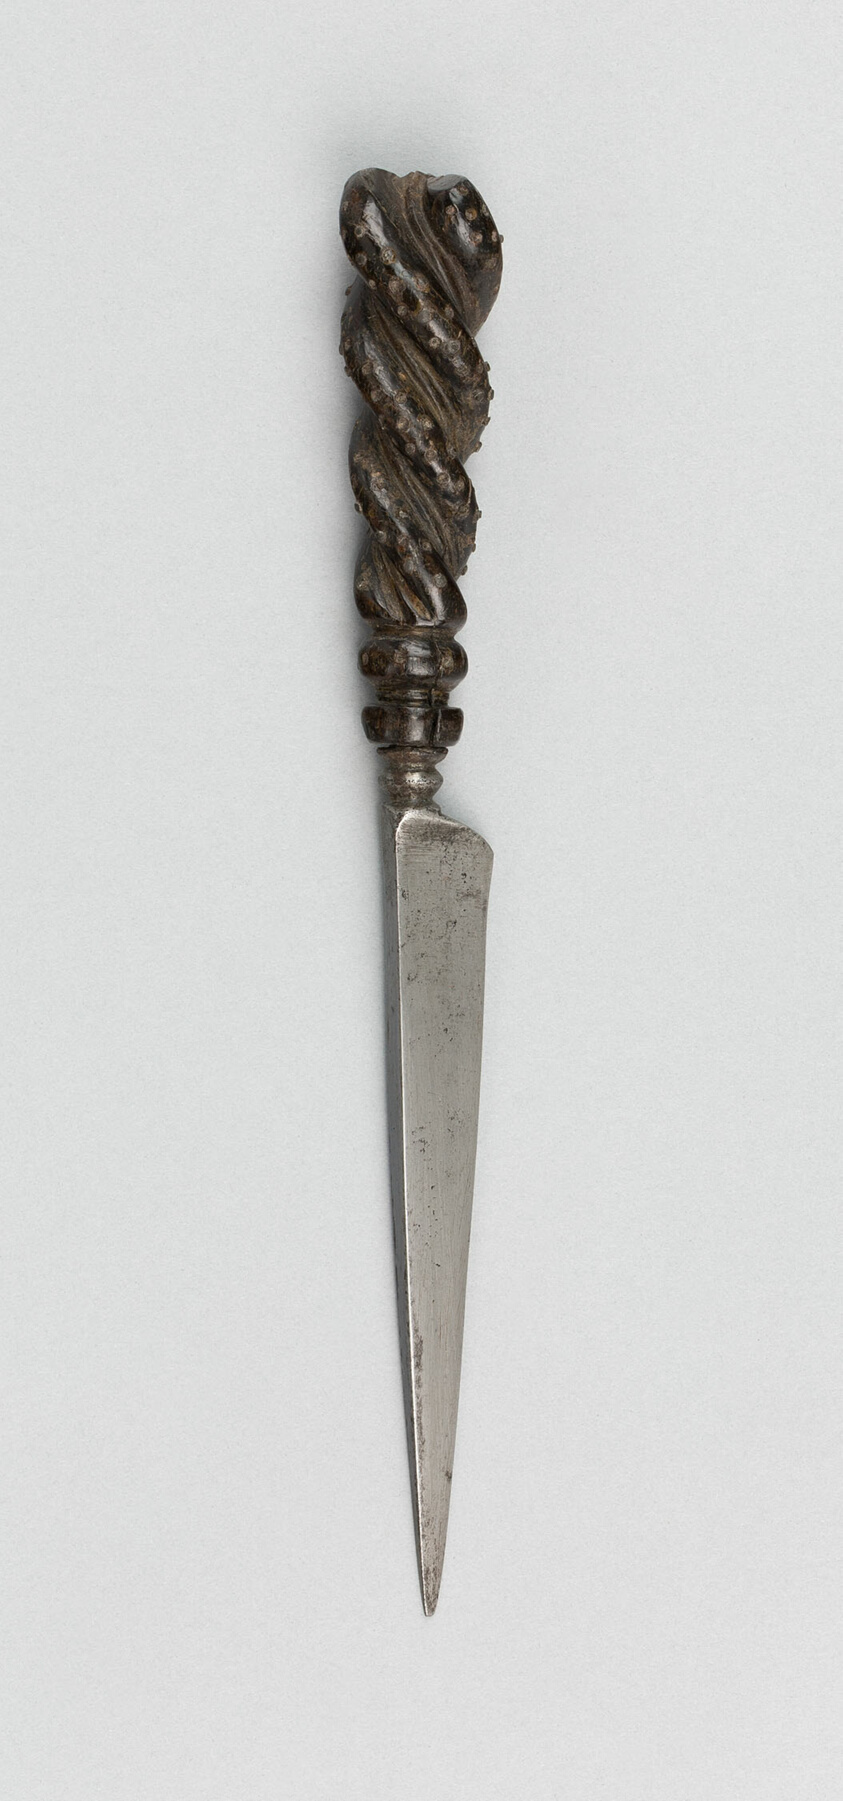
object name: Arms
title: Dirk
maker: Spanish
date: 17th century (?)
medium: Horn grip and silver nails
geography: Spain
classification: edged weapon-dagger; arms; arms and armor